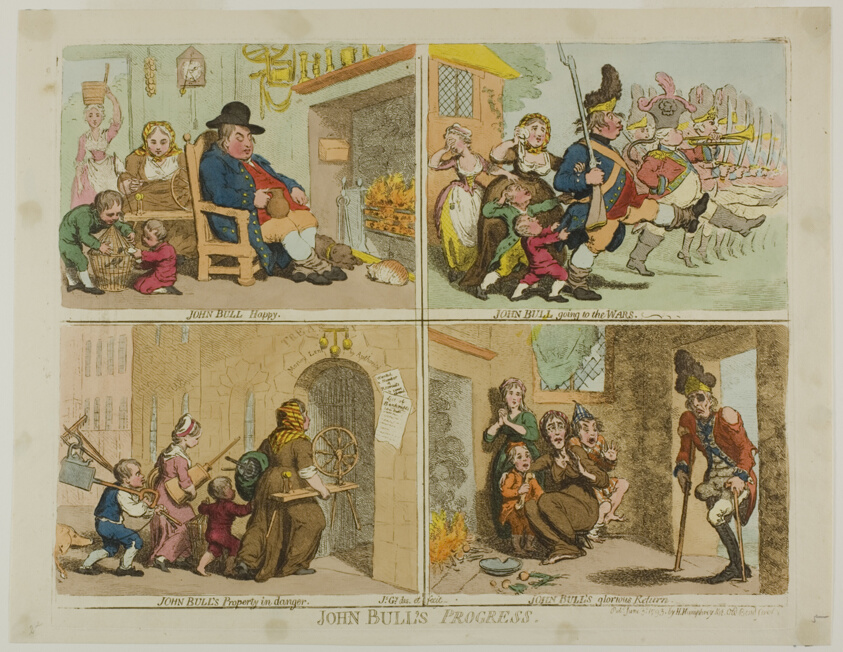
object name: Print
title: John Bulls Progress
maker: James Gillray (English, 1756-1815); published by Hannah Humphrey (English, c. 1745-1818)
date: published June 3, 1793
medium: Hand-colored etching on paper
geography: England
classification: etching; print; prints and drawing